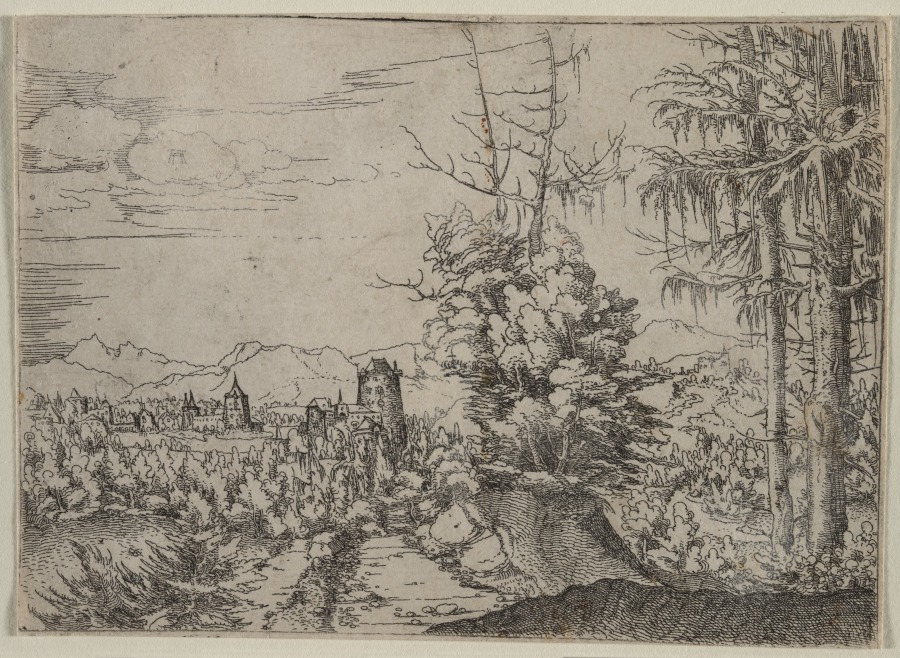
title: Landscape with Two Pines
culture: Germany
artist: Albrecht Altdorfer (German, c. 1480–1538)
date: 1521–22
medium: etching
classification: Print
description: Primarily a painter and draftsman, Albrecht Altdorfer made only nine etchings, which were intended to imitate his drawings. Those he made between 1522 and 1525—printed in very small numbers for a growing market of print collector—are considered the first prints in European art to depict pure landscape without narrative or devotional content. Here, he displayed remarkable freedom of draftsmanship and apparent spontaneity. The site depicted cannot be readily identified, and Altdorfer probably composed it from his imagination. Early etchings, such as this one, were made on iron rather than copper plates, which rendered the lines slightly hazy.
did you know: To make this early etching, the artist used an iron plate rather than the more supple copper, which would shortly come to dominate etching technique.